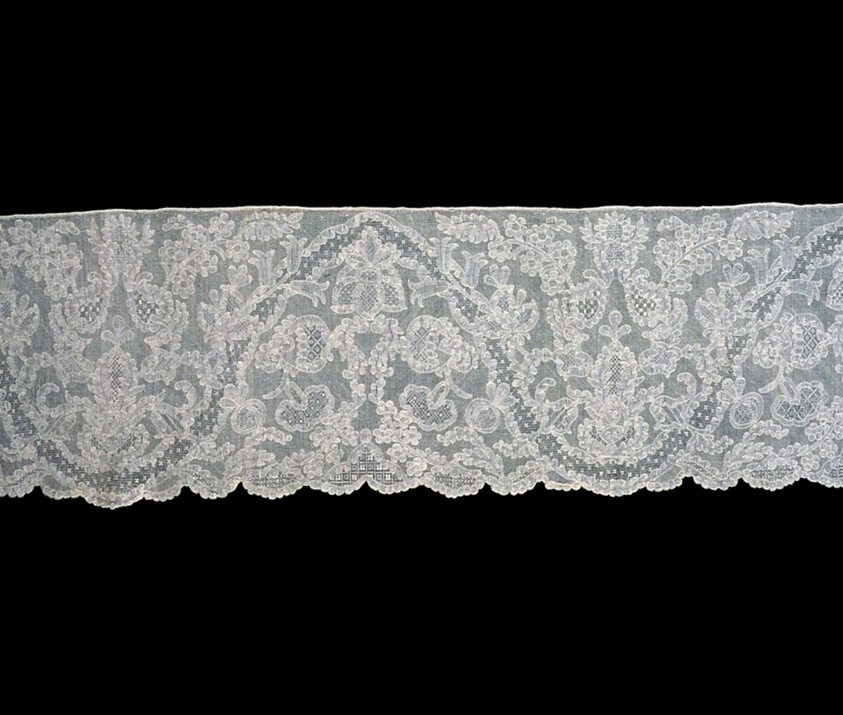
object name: Textile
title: Flounce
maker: Possibly France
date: 1740s/50s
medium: Linen, plain weave; pulled thread work embroidered in Algerian eye, back, buttonhole, open buttonhole filling, twisted buttonhole filling, cross, crossed back, interlocking lace, overcast, running, satin, and single faggot stitches; couching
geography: France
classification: textile; needlework (visual works)